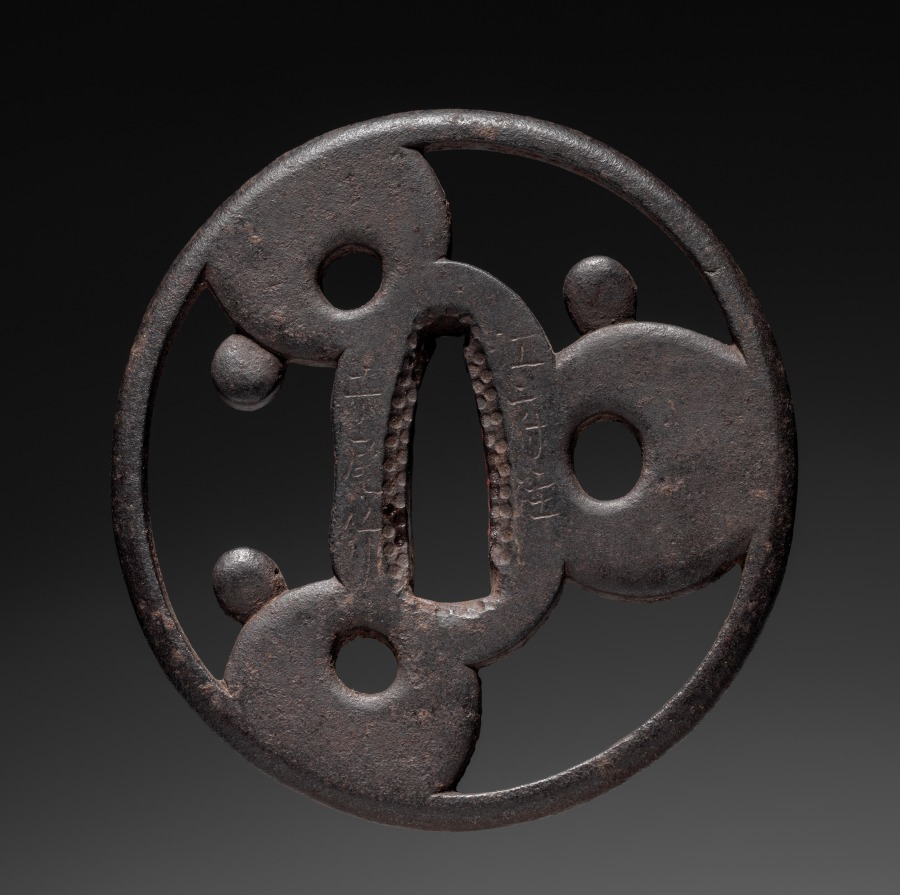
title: Sword Guard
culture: Japan, Edo period (1615–1868)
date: early 1800s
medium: iron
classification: Arms and Armor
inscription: Signature: Akao, residing at Kofu (Edo), made.